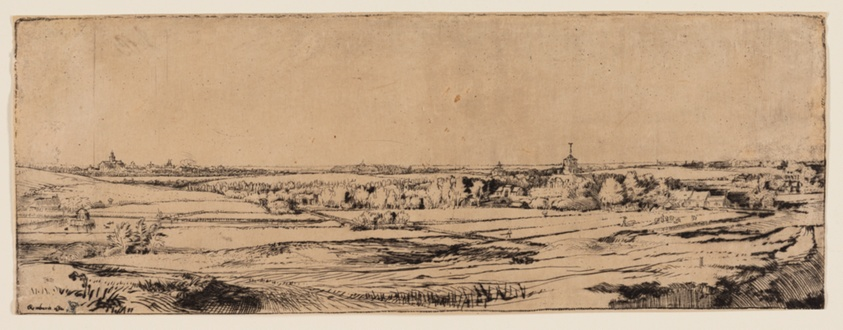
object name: Print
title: Panorama Near Bloemendaal Showing the Saxenburg Estate (The Goldweigher's Field)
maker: Rembrandt van Rijn (Dutch, 1606-1669)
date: 1651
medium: Etching and drypoint in black on cream Japanese paper (discolored to tan)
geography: Holland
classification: etching; print; prints and drawing; paper; drypoint